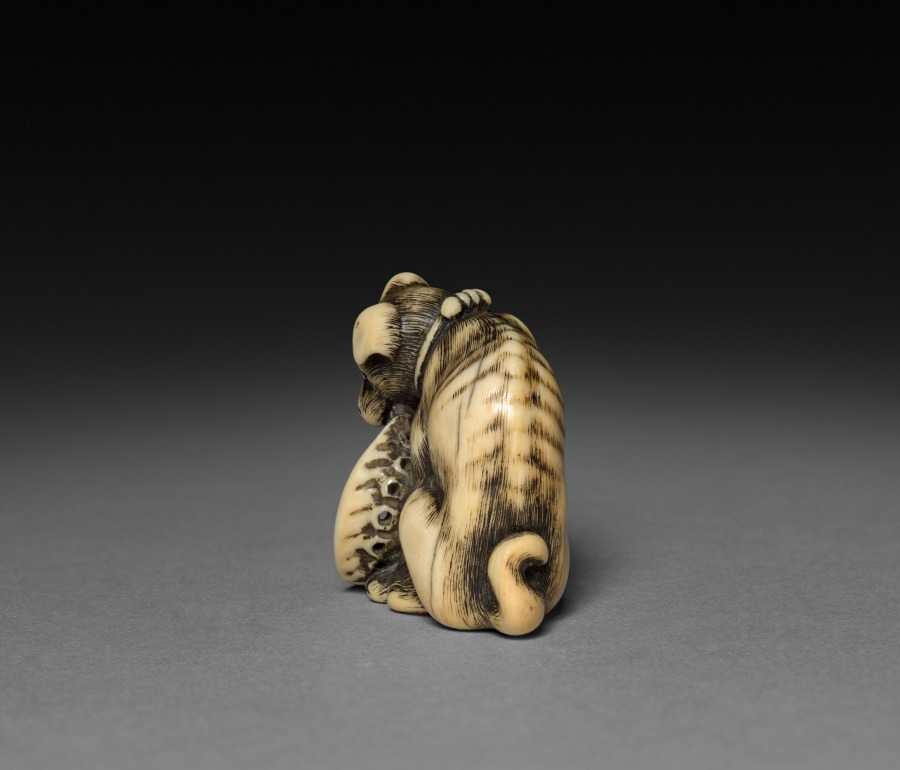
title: Dog with Shell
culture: Japan, Edo period (1615–1868)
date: 1700s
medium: ivory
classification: Netsuke